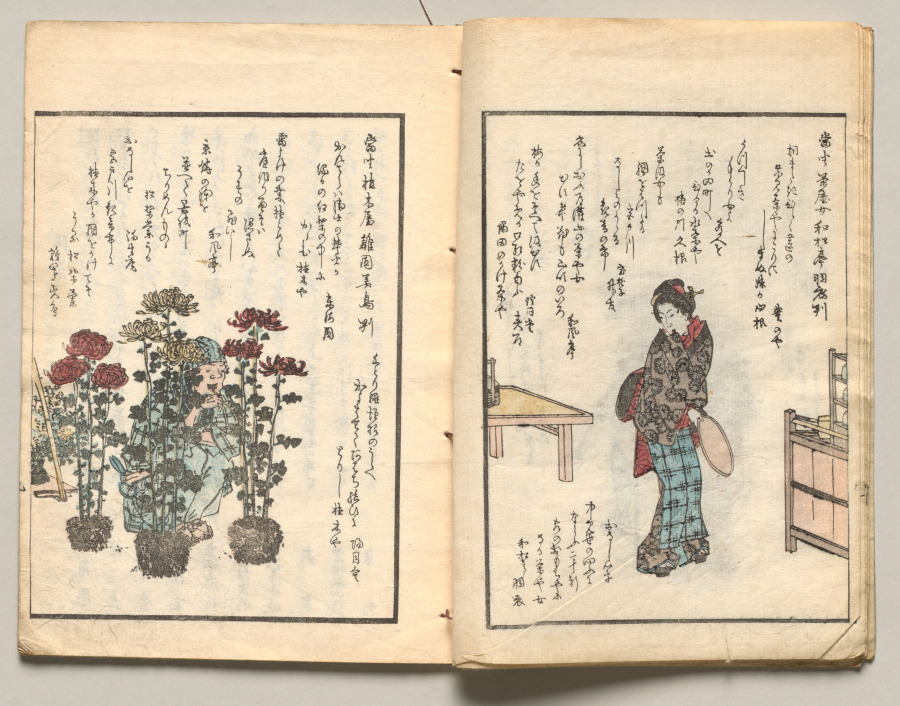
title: Spread Nine from Volume Four of People of Japan in Light Verse (Kyōka)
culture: Japan, Edo period (1615–1868)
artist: Utagawa Hiroshige (Japanese, 1797–1858)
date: 1857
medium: Woodblock-printed book; ink and color on paper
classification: Bound Volume